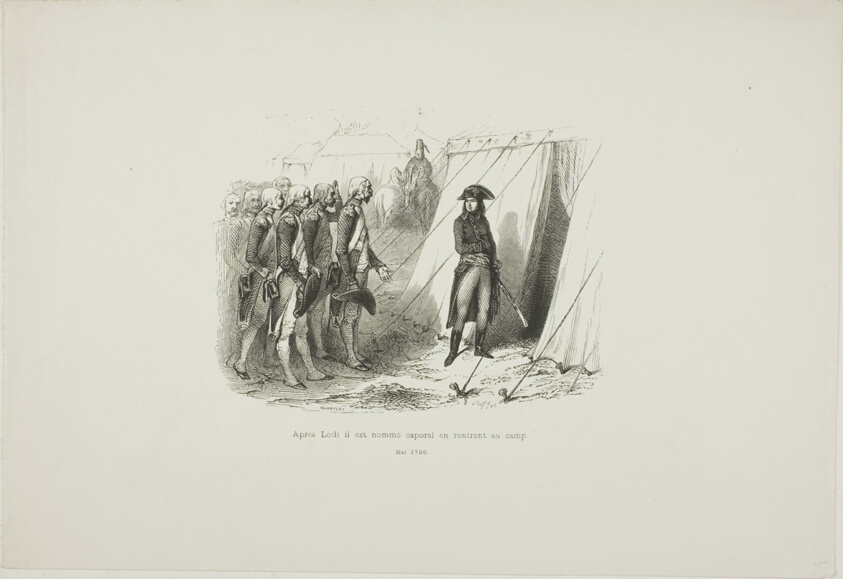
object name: Print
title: After Lodi, he is named corporal upon returning to camp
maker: Quartley (19th century); after Denis Auguste Marie Raffet (French, 1804-1860); written by M. de Norvins (French, active 19th century); published Furne, Éditeur (French, active 19th century)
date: published 1839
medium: Wood engraving in black on ivory wove paper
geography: France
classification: wood engraving; print; prints and drawing